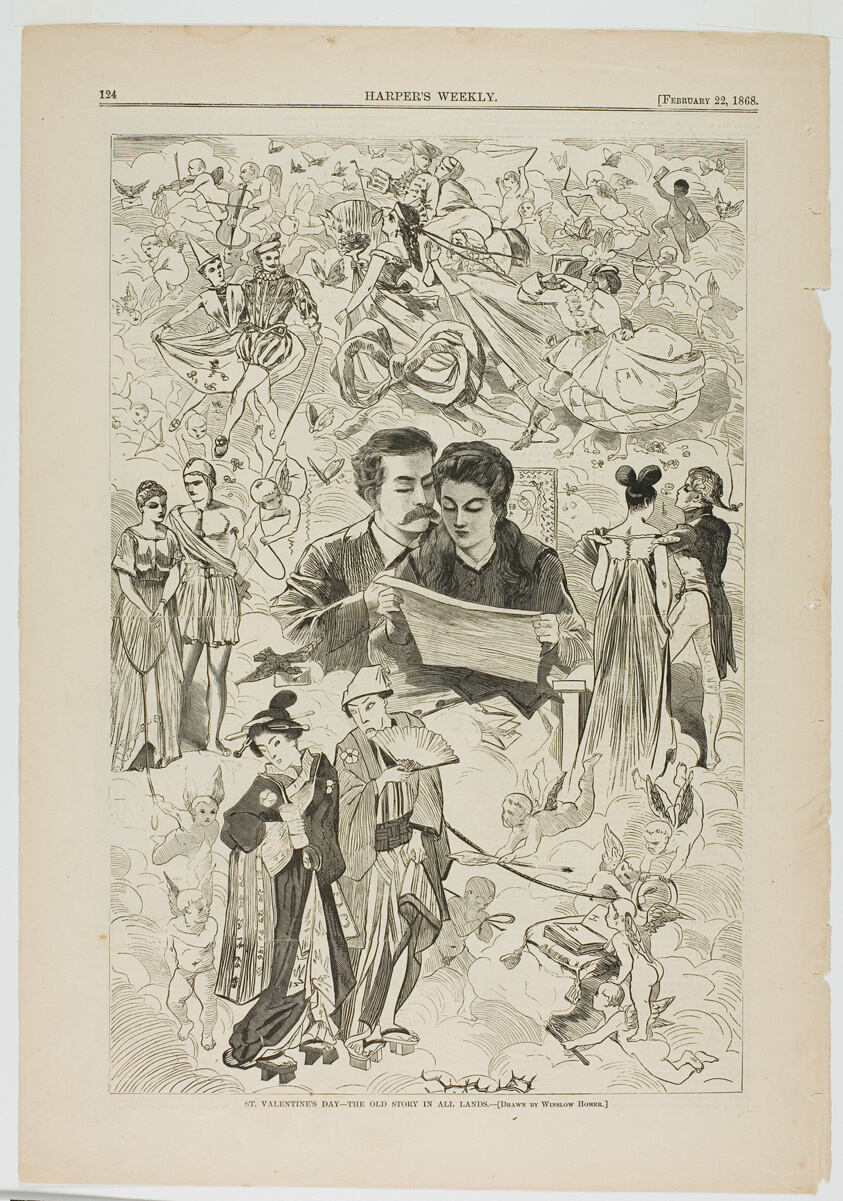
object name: Print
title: Saint Valentine's Day—The Old Story in All Lands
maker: Winslow Homer (American, 1836-1910); published by Harper's Weekly (American, 1857-1916)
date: published February 22, 1868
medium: Wood engraving on paper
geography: United States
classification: wood engraving; print; prints and drawing